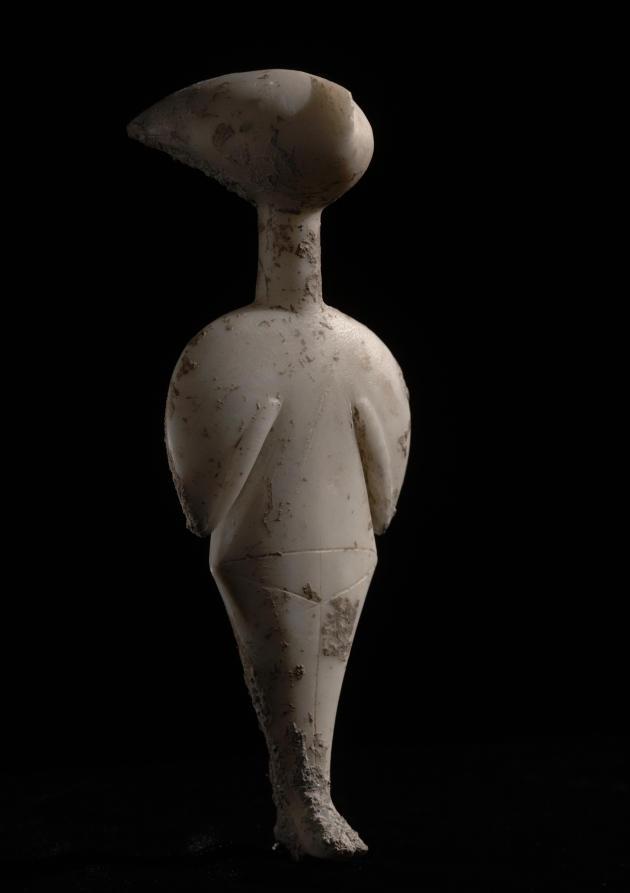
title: Statuette of a Woman: "The Stargazer"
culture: Western Anatolia, early Bronze Age (c. 3300–1200 BCE)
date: c. 3000 BCE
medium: marble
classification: Sculpture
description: "The Stargazer" moniker was given to this diminutive marble sculpture because its upturned head looks toward the heavens. Details carved into the stone are visible while painted features have been lost to time. We do not know how this object was used, but its enigmatic nature invites speculation.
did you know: We can identify this mysterious figure as female by the inscribed pubic triangle below her waist.